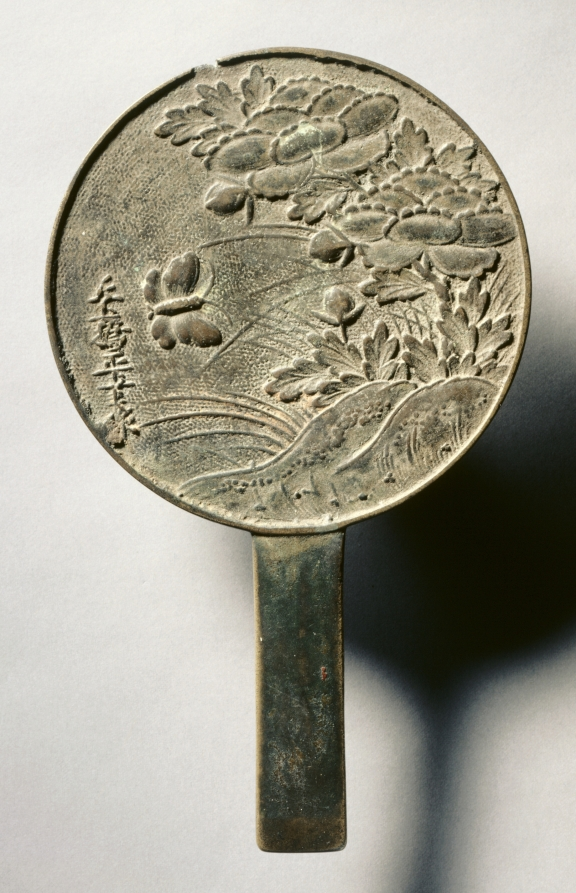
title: Mirror with Handle, Decorated with a Butterfly and Blooming Peony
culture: Japan, Edo period (1615–1868)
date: early 1600s to mid-1800s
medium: bronze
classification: Metalwork